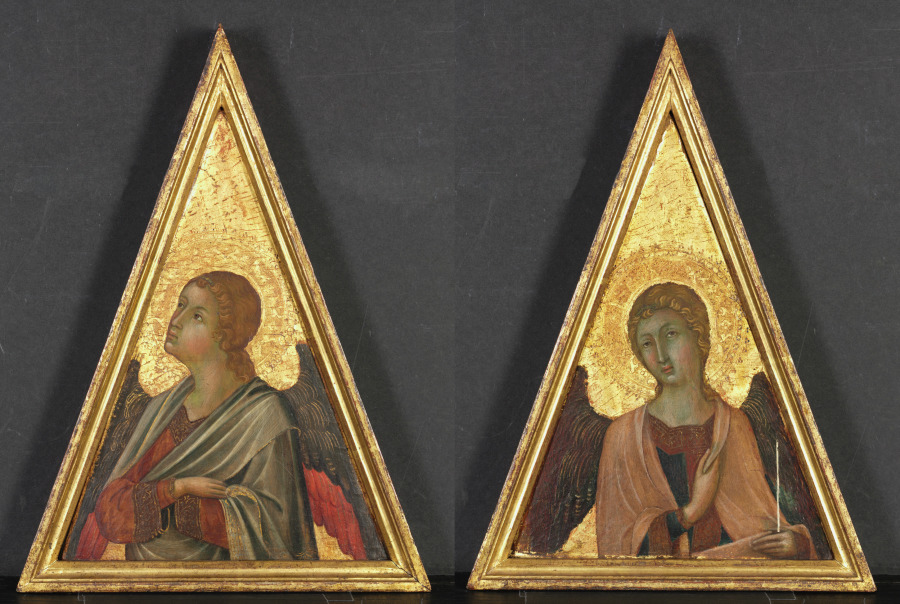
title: Pinnacle with Angel (pair)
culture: Italy, Siena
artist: circle of Niccolò di Segna (Italian)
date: c. 1340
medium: tempera and gold on wood panel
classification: Painting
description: These pinnacles were originally set on top of a multipanel altarpiece that has now been lost. The angels' gestures and glances suggest that they were placed to the left and right of a central image.